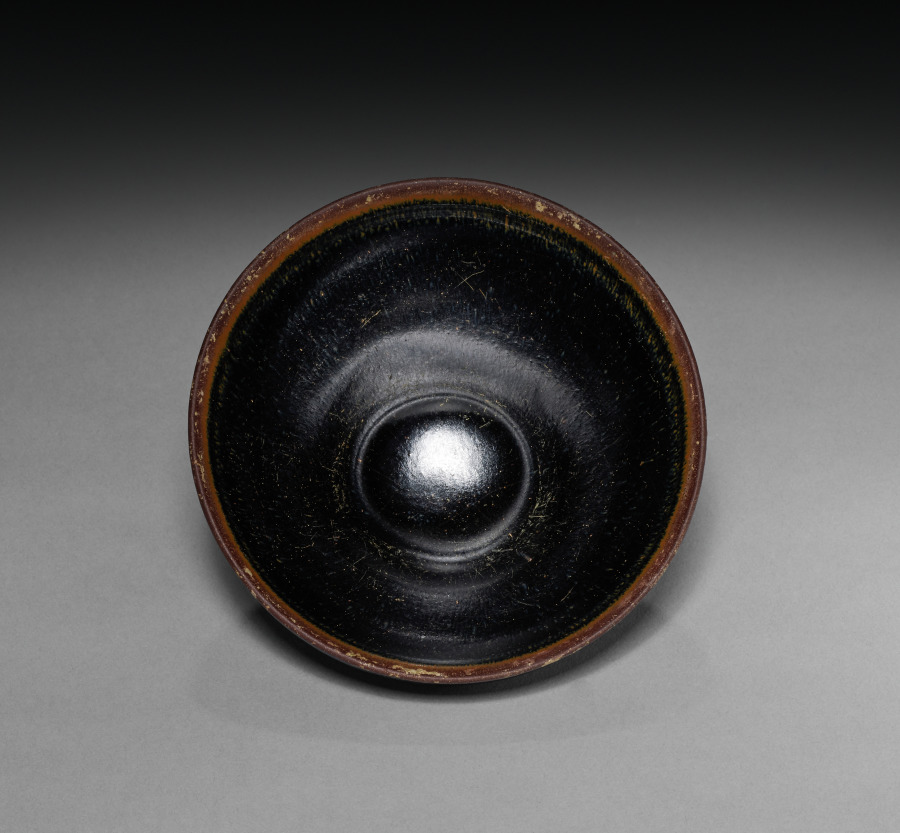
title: Black-Glazed Teabowl with Incised Characters (供御) for “Imperial Tribute”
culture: China, Fujian Province, Southern Song dynasty (1127-1279)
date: 1100s–1200s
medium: Brown-glazed stoneware, Jian ware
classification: Ceramic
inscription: 供御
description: Teabowls with incised characters are rare. The characters 供御 (gongyu; “imperial tribute”) incised on the base of this bowl suggest that it was local annual tribute ware presented to the court. The abrasions on its rim indicate the cup was originally mounted with a metal ring that has been removed. Teacups, occasionally dressed with metal bands to cover the rough, thinly glazed lip, enhanced the experience of tasting tea and rendered the bowl more precious and appealing. When steeped tea leaves were introduced in China, dark-glazed bowls fell out of favor, but such bowls continued to be treasured in Japan where powdered tea (matcha) remained popular.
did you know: Jian ware was commonly associated with tea drinking and tasting, as the light color of tea contrasted nicely with the dark glazes of the ceramics.